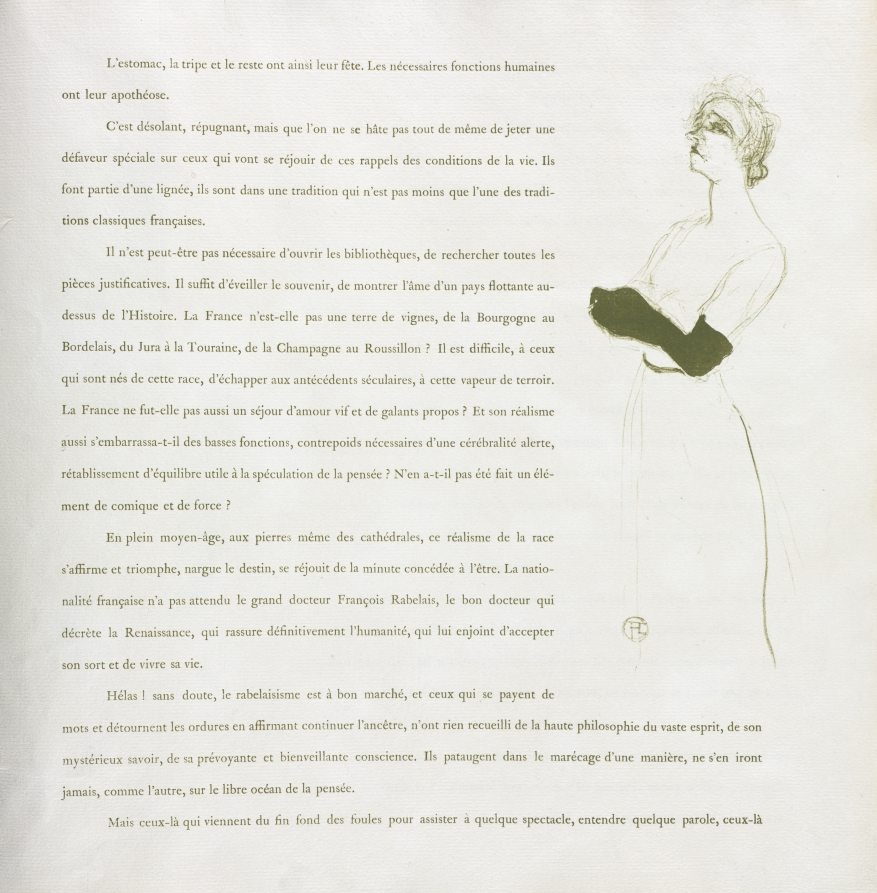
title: Yvette Guilbert-French Series: No. 10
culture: France, 19th century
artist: Henri de Toulouse-Lautrec (French, 1864–1901)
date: 1894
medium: lithograph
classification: Bound Volume